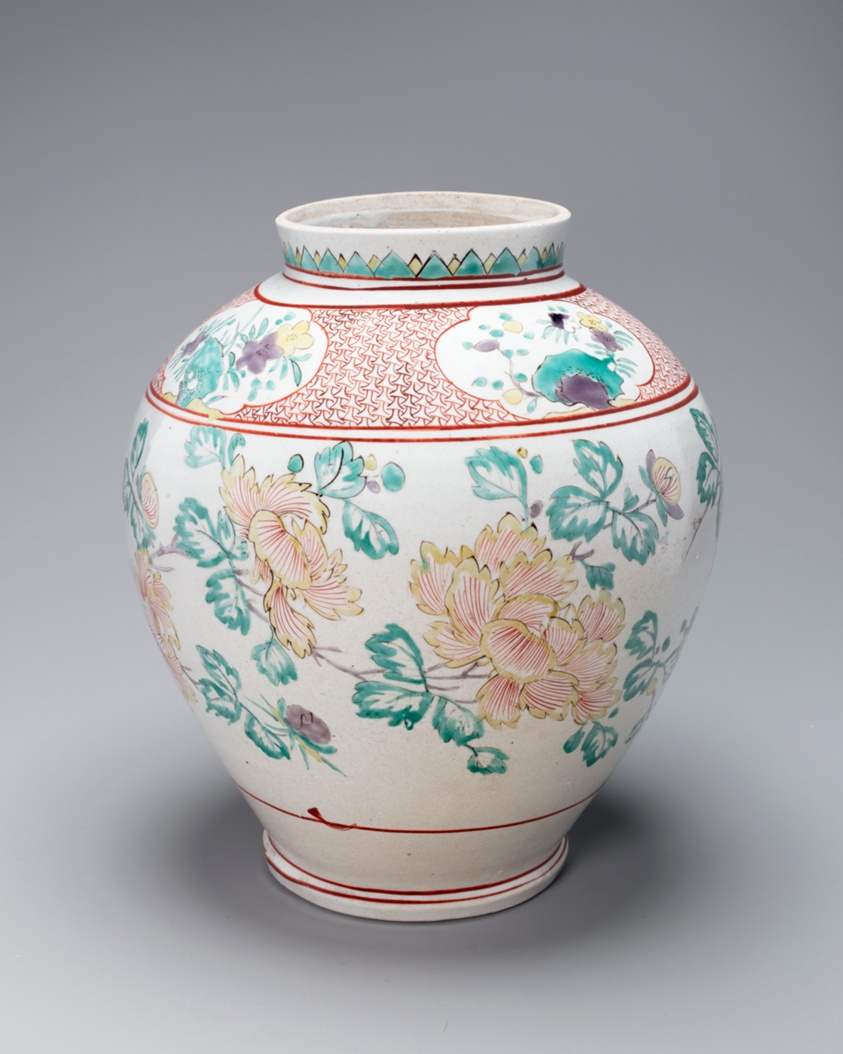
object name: Decorative Arts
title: Jar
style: Japanese (culture or style)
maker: Japanese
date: early Edo Period, early 17th century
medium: Arita ware, Kutani style; porcelain with polychrome enamel glaze decoration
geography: Japan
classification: porcelain; asian art; ceramics; decorative arts